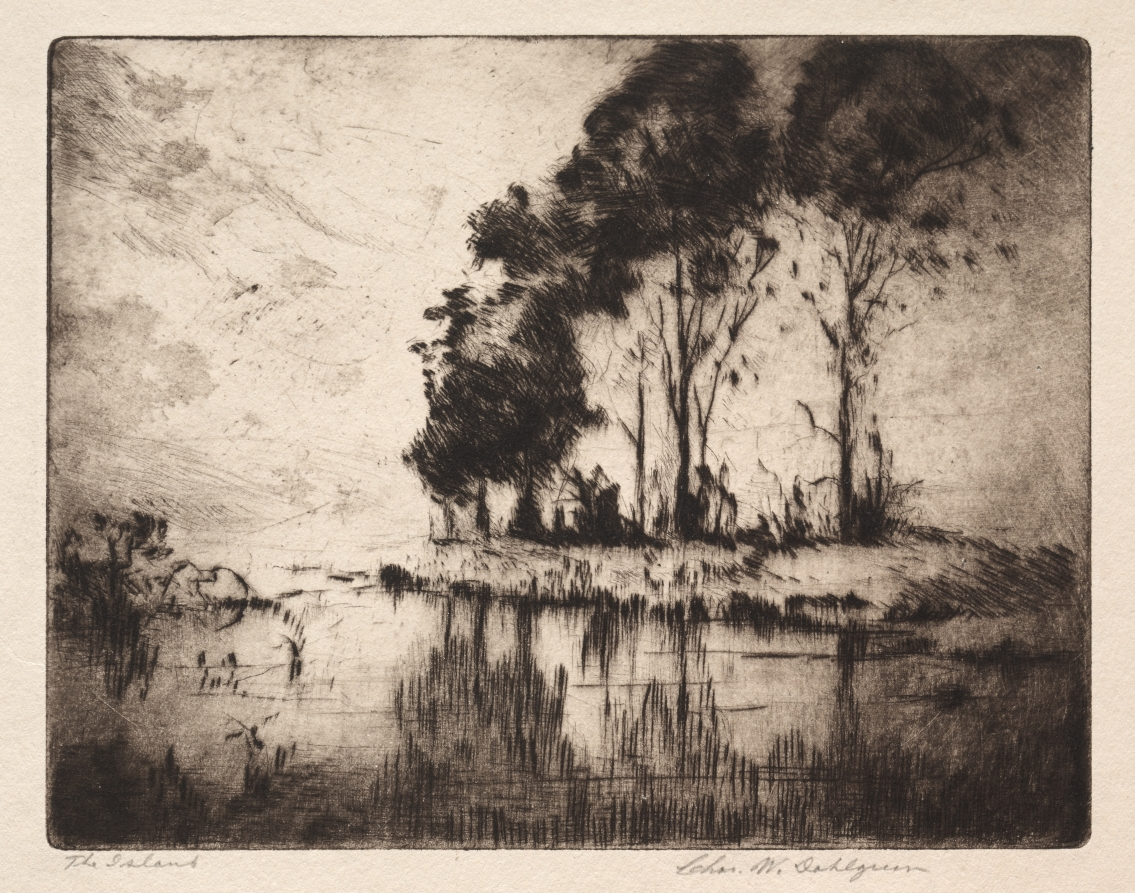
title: The Island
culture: America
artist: Charles William Dahlgreen (American, 1864–1955)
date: 1922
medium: drypoint and aquatint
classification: Print